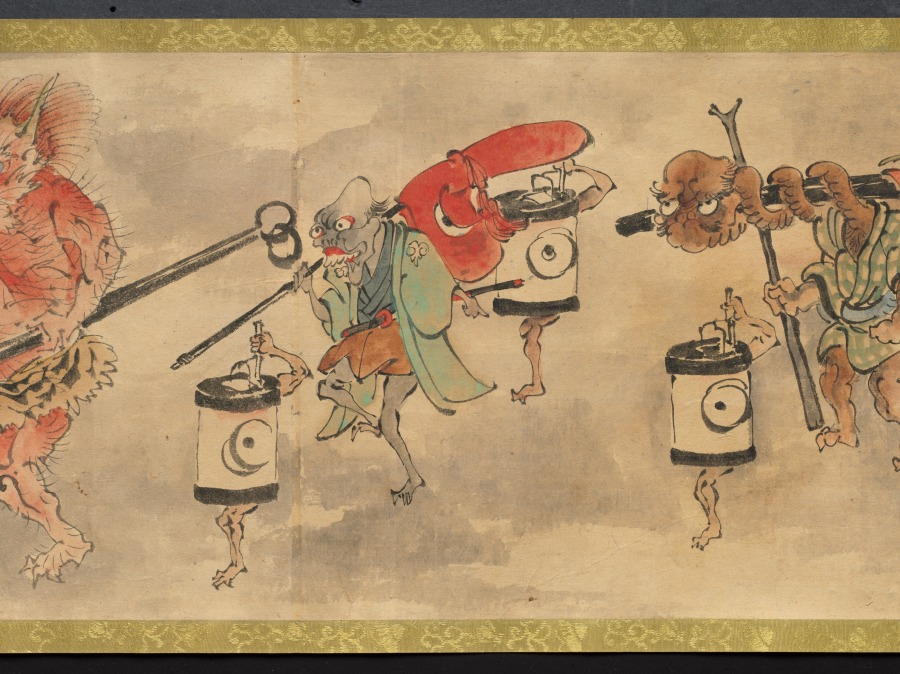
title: An Illustrated Marriage of Apparitions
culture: Japan, Edo period (1615–1868)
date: mid-1800s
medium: handscroll; ink and color on paper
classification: Painting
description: The matchmaking, engagement, wedding, and birth of the first child of two apparitions, or bakemono, literally "things that change," are illustrated in this whimsical, humorous handscroll. Japanese folklore abounds with such strange creatures, most famously represented in handscrolls featuring a procession of 100 supernatural monsters. Aside from a textual preface and cartouches indicating the content of the scenes, the tale is told visually. The artist and whereabouts of the original handscroll are unknown, but a number of other 19th-century copies by amateur painters exist in Japanese collections, attesting to its broad appeal.